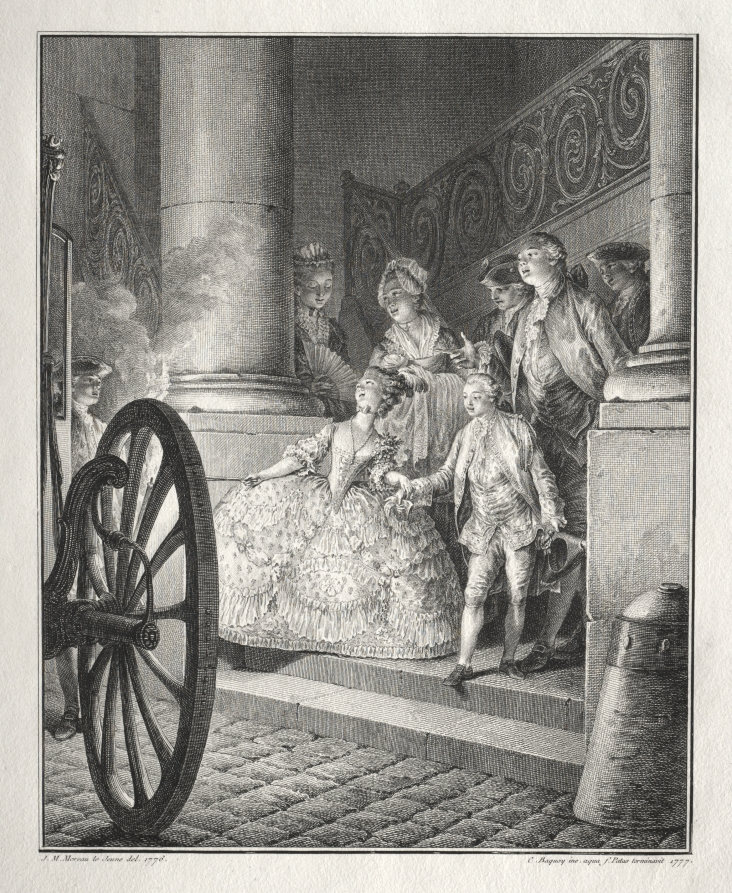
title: Rêtif de la Bretonne: The Little Godparents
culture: France, 18th century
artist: Jean-Michel the Younger Moreau (French, 1741–1814)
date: 1777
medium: etching and engraving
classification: Print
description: Moreau was a printmaker and book illustrator, known best for his ability to depict fashion, poses, and gestures. Published in Monument du costume physique et morale, a suite of prints portraying the manners and dress of fashionable society at the end of the 1700s, this scene is part of a sequence narrating the pregnancy and birth of a young couple’s first son. Here, a superbly dressed boy and girl exit a mansion toward a waiting coach; behind them, a wet nurse carries their godson, whose gesturing father stands to the side with two footmen.